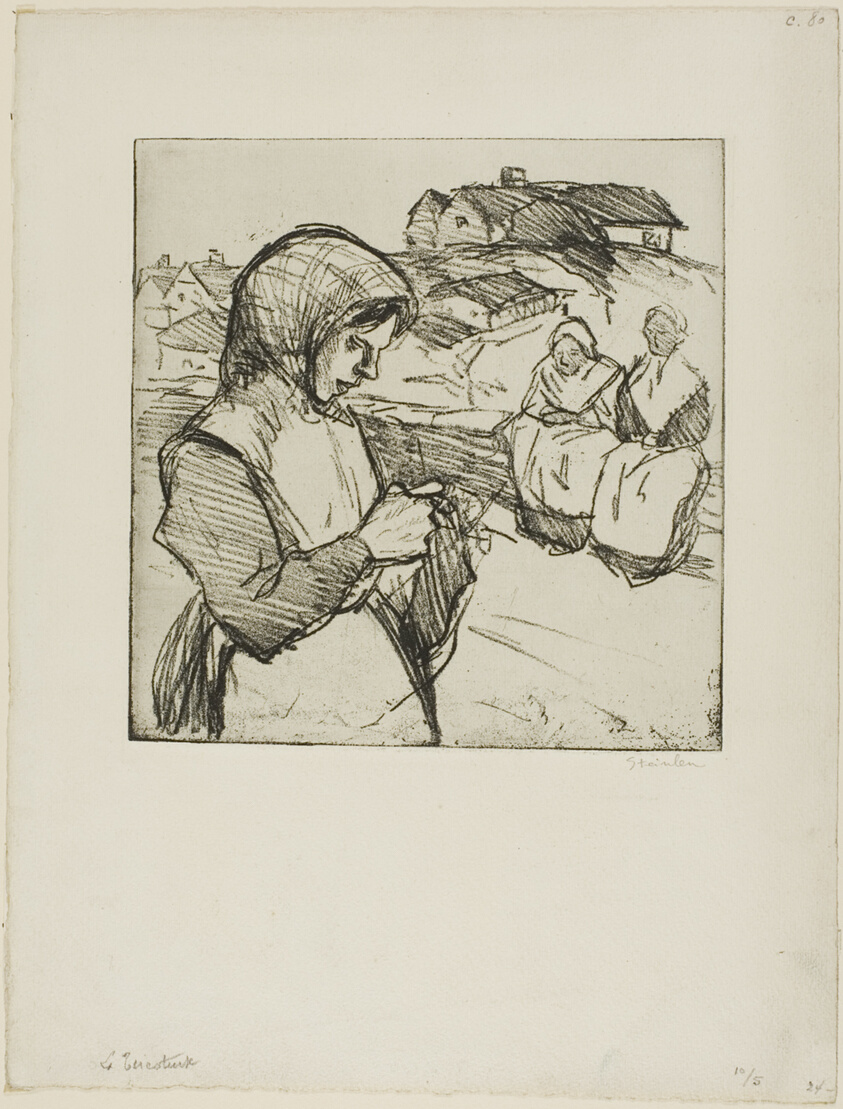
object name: Print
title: The Knitter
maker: Théophile-Alexandre Steinlen; French, born Switzerland, 1859-1923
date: 1902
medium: Soft ground etching from a zinc plate on ivory laid paper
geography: France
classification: etching; print; prints and drawing